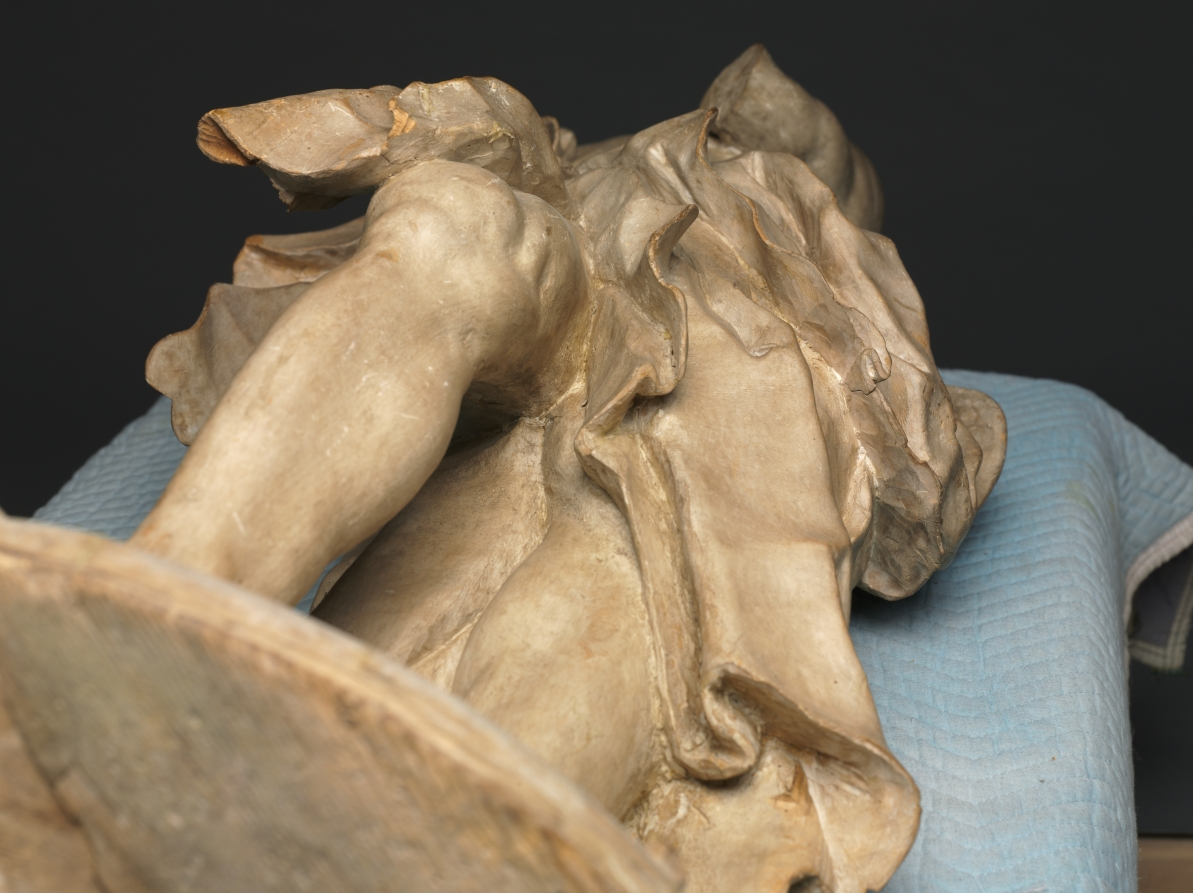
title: A Saint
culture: Germany or Austria, 18th century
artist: follower of Diego Francesco Carlone (Italian, 1674–1750)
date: c. 1730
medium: wood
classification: Sculpture